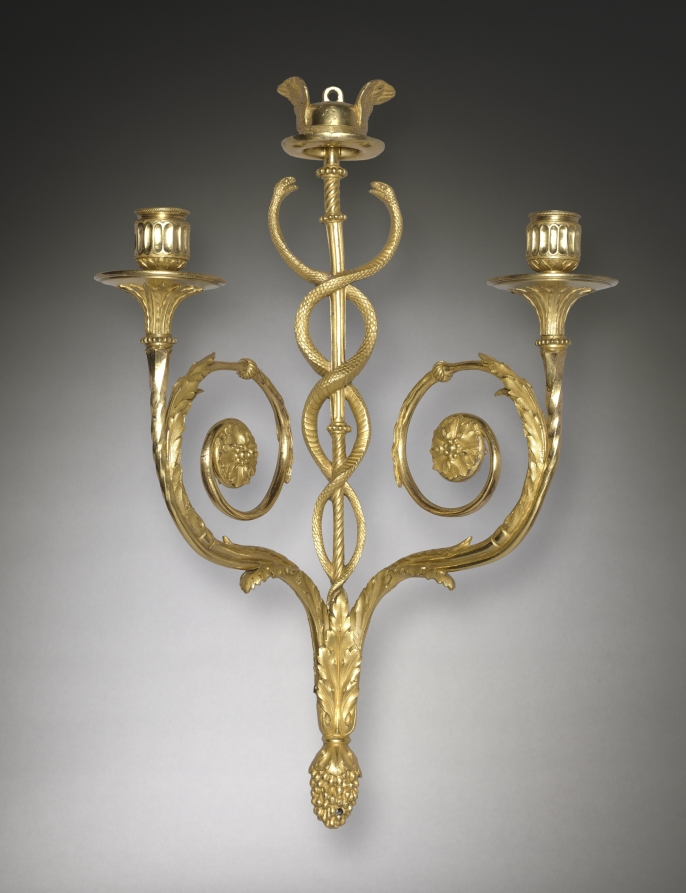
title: Louis XVI Style Candle Bracket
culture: France, style of Louis XVI, 18th Century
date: c. 1775–1790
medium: gilded bronze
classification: Furniture and woodwork